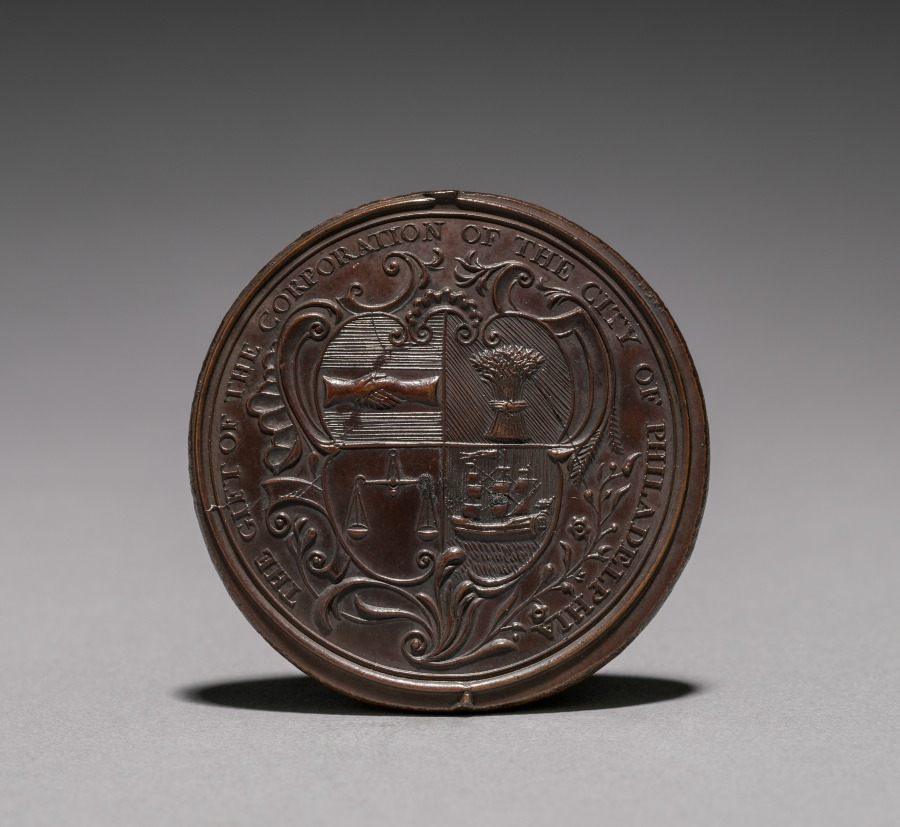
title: Medal: Commemorating the Destruction of Kittanning by Col. Armstrong, 8 September 1756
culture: America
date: 1756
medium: bronze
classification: Metalwork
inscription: The gift of the Corporation of the City of Philadelphia.